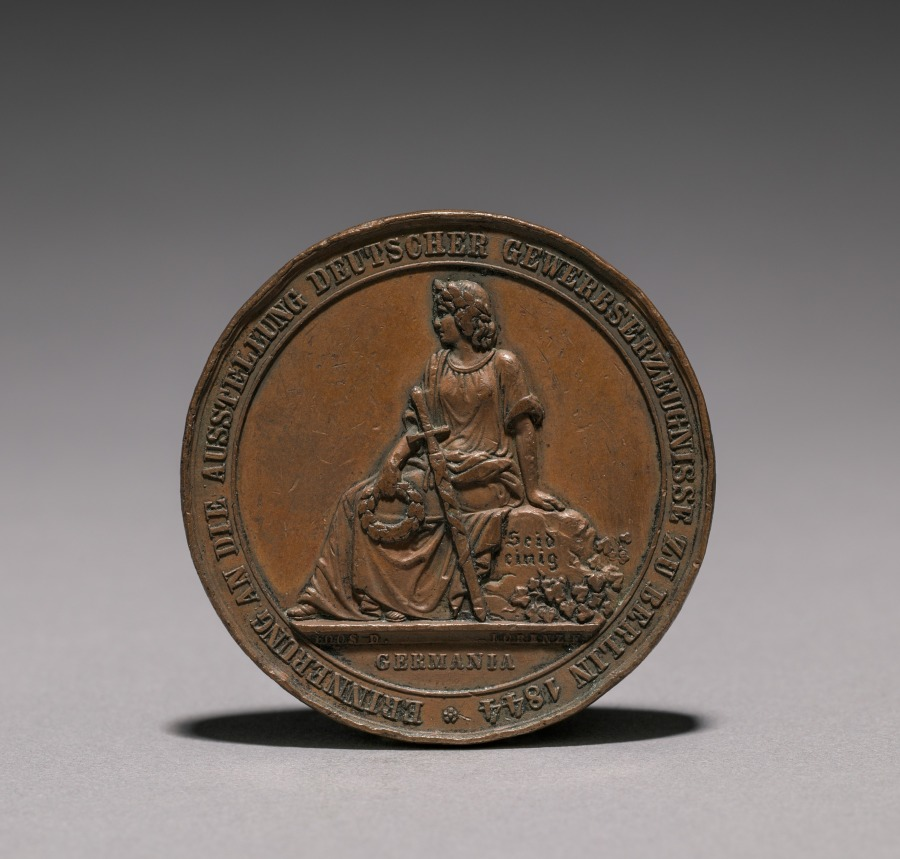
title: Medal Commemorating the Exhibition of Textiles, Berlin, 1844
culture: Germany, 19th century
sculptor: Emil Schilling (German)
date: 1844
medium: bronze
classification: Metalwork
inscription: "ERNNERUNG AN DIE AUSSTELLUNG DEUTSCHER GEWERBSERZEUGNISSE ZU BERLIN 1844 GERMANIA."